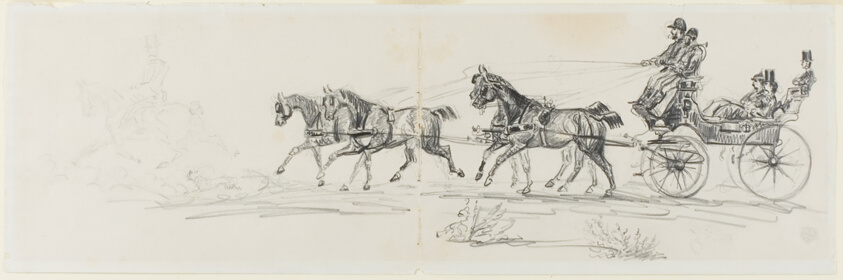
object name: Drawing and Watercolor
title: Horse-Drawn Carriage Preceded by Single Rider (recto); Man Riding Horse with a Blanket and Sketches of Heads, Horses and Triumphal Arch (verso)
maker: Henri de Toulouse-Lautrec (French, 1864-1901)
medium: Graphite (recto), and graphite and pastel and black crayon (verso), on white wove paper (discolored to buff)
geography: France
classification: graphite; drawings (visual works); prints and drawing